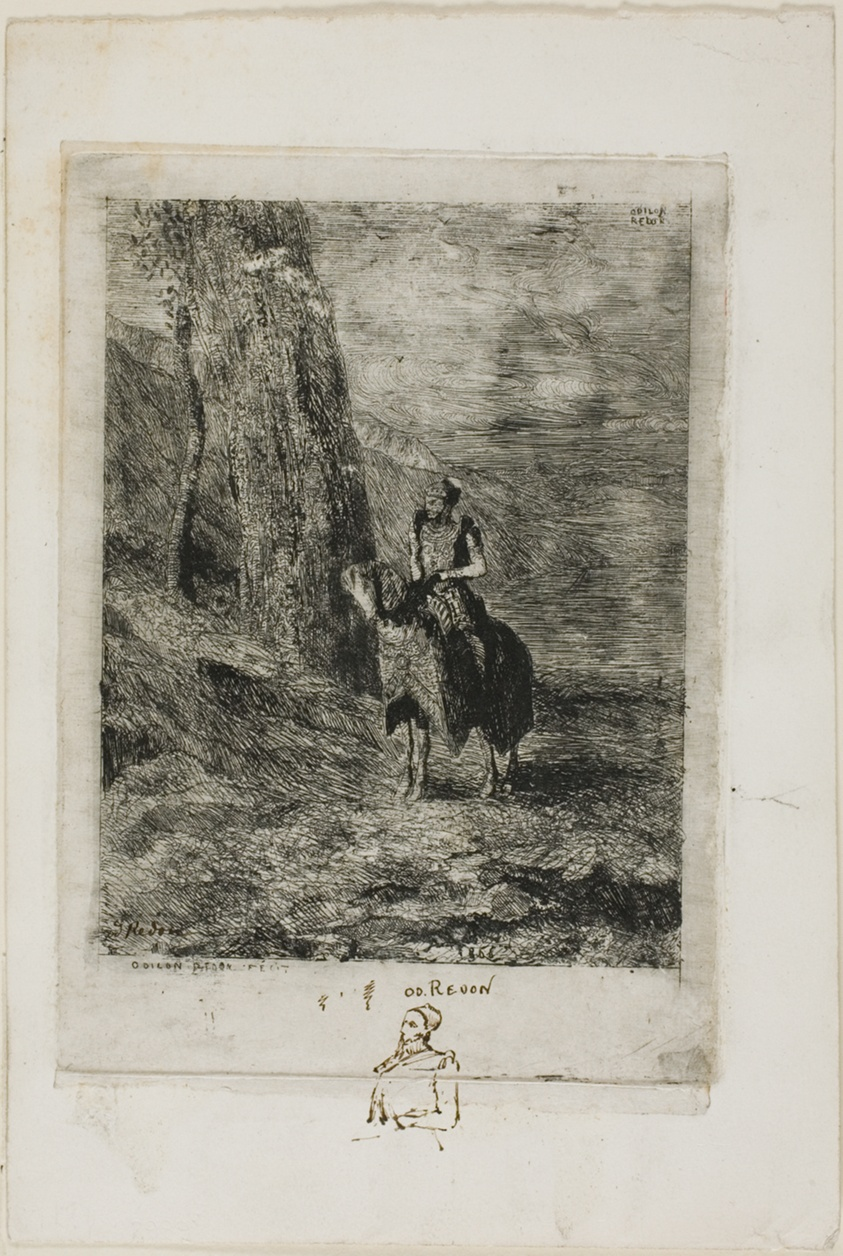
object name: Print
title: Horseman Waiting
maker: Odilon Redon (French, 1840-1916)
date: 1866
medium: Etching on light gray China paper laid down on ivory wove paper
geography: France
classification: etching; print; prints and drawing; paper